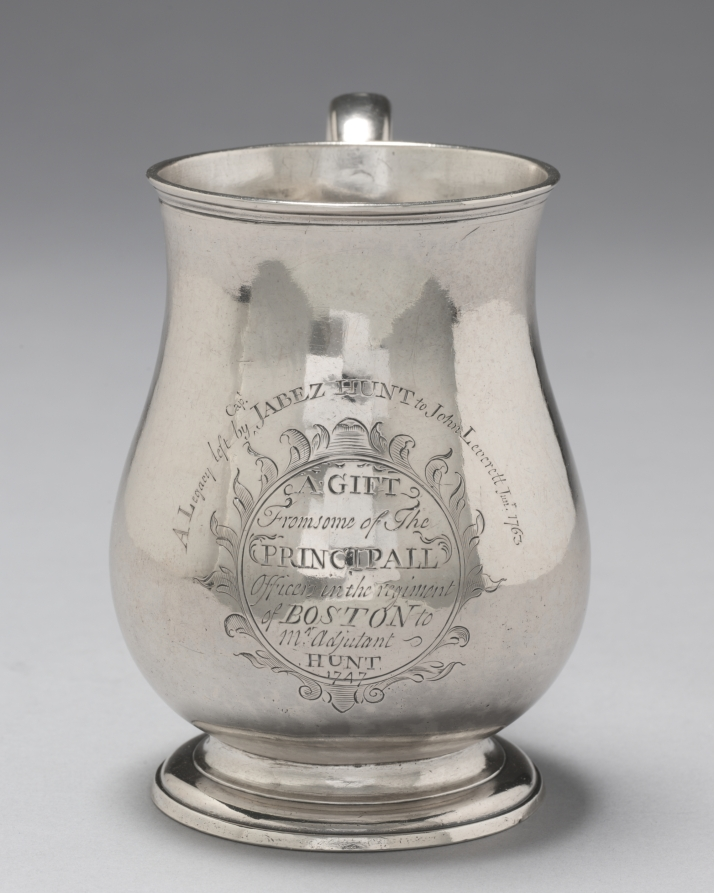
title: Cann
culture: America, Massachusetts, Boston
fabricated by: Jacob Hurd (American, 1702–1758)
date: 1747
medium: silver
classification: Silver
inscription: engraved within reserve on front, opposite handle: "A GIFT/From some of The/PRINCIPALL/ Officers in the regiment/of BOSTON to/Mr Adjutant/HUNT/1747." Above the reserve: "A Legacy left by Capt JABEZ HUNT to John Leverett Junr 1763."